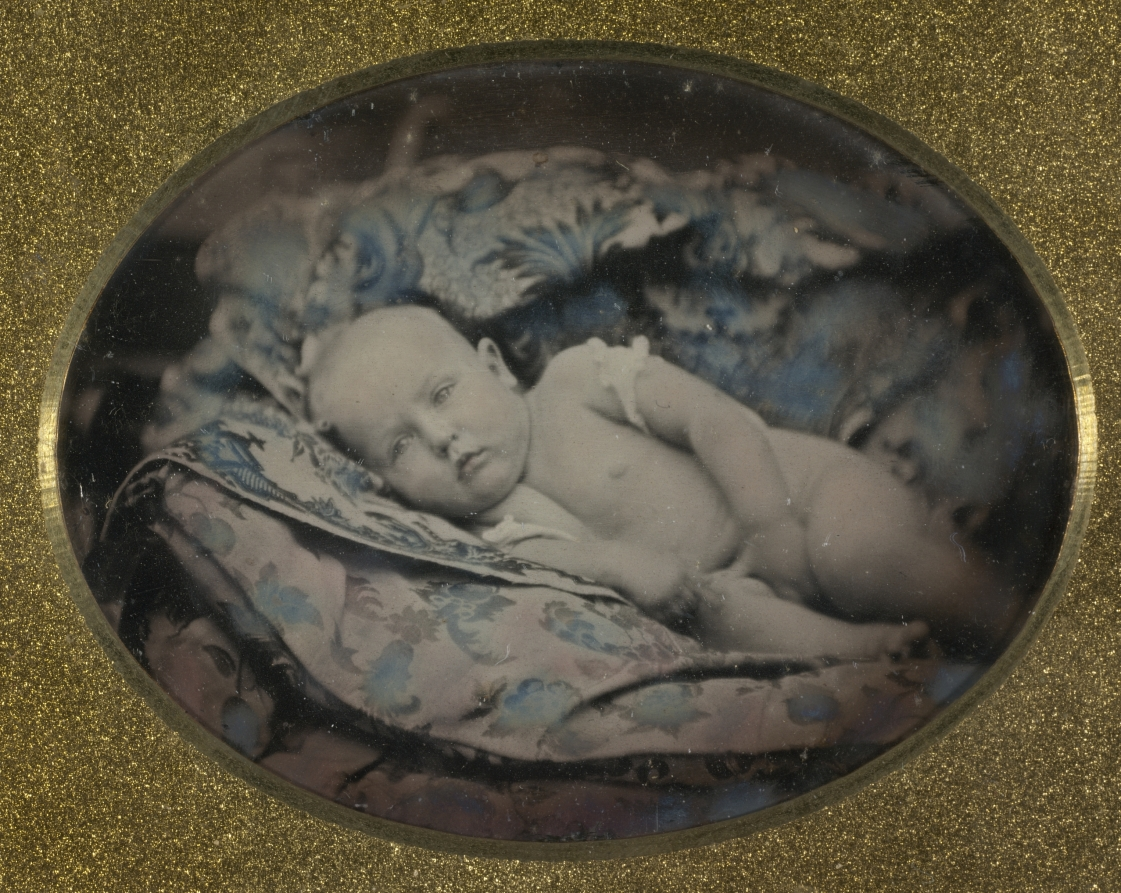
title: Alice Montgomery (1850-1917)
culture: America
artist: Enoch Long (American, 1823–1898)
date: 1850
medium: daguerreotype, applied color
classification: Photograph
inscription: Written in black ink on enclosed paper: "Alice Montgomery / 1850-1917"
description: Children have always been particularly cherished subjects for photography. Portraits were made to preserve the memory of their stages of growth and, in an age when long-distance travel was rare, to share with faraway relatives. And, for a sadder reason: in 1840 an estimated one-third of children died before age five. Photography offered grieving parents the opportunity to immortalize their children’s features. This tragic genre of photographs, later called “post-mortems,” often depicts the children in fine clothing, laying down with eyes shut, as if merely napping.